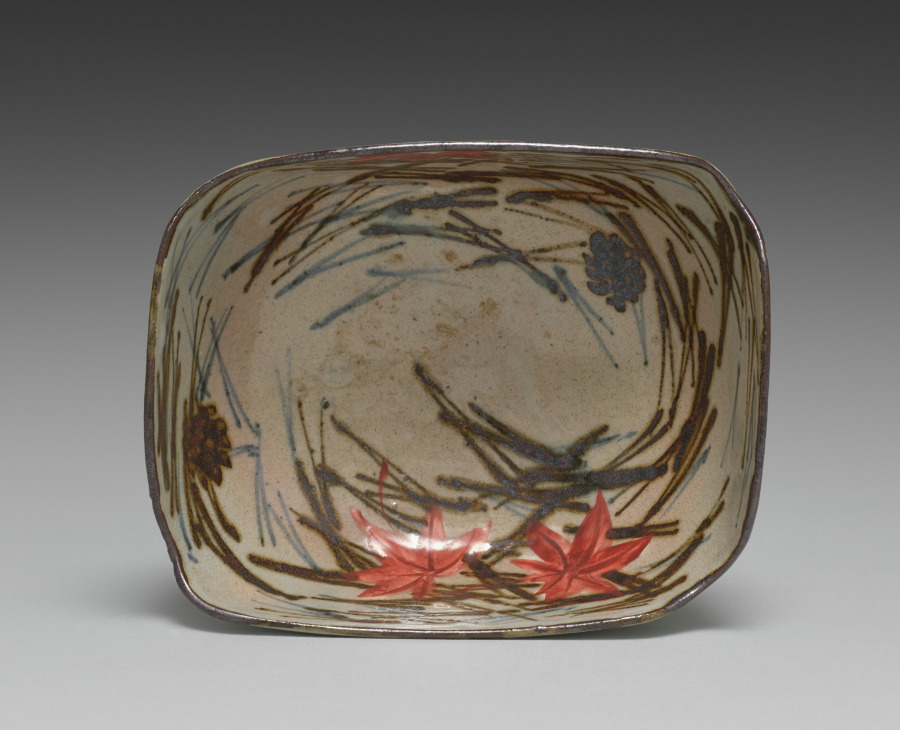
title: Nesting Dish with Scattered Pine Needles and Maple Leaves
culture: Japan, Edo period (1615–1868)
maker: Seifū Yohei I (Japanese, 1801–1861)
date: 1861–78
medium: One of a pair of side dishes; stoneware with underglaze blue and iron oxide, white slip, and overglaze color enamel (Kyoto ware)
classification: Ceramic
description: Seifū Yohei I made both blue and white porcelains after Ming dynasty (1368–1644) Chinese wares fired in the kilns at Jingdezhen for export. He also made colorful stoneware in the style of his teacher, Nin’ami Dōhachi (Takahashi Dōhachi II) (1783–1855).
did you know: The smaller dish is stamped with one of Yohei I’s seals.